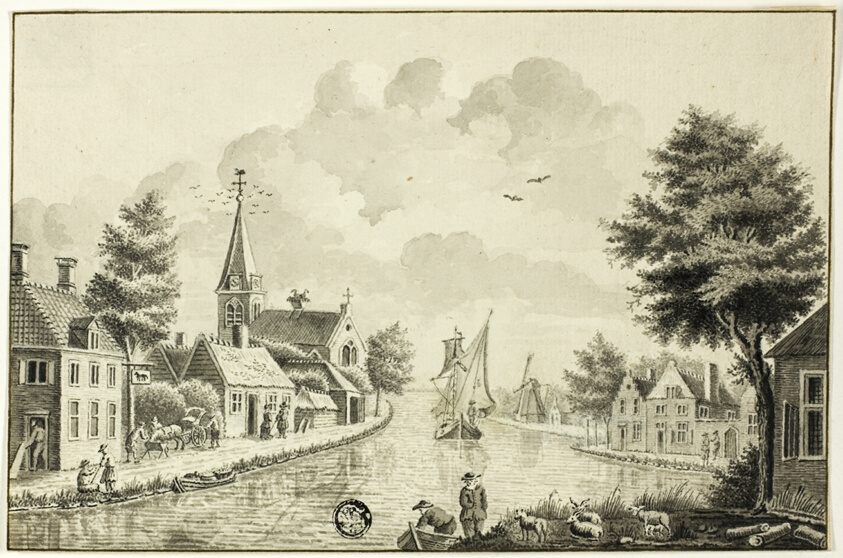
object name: Drawing and Watercolor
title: Old Dutch Town on Canal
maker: After Isaac van Ketweg; Dutch, c. 1732-1787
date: after 1738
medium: Pen and black ink and brush and gray wash on ivory laid paper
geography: Holland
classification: ink or chalk wash; drawings (visual works); prints and drawing